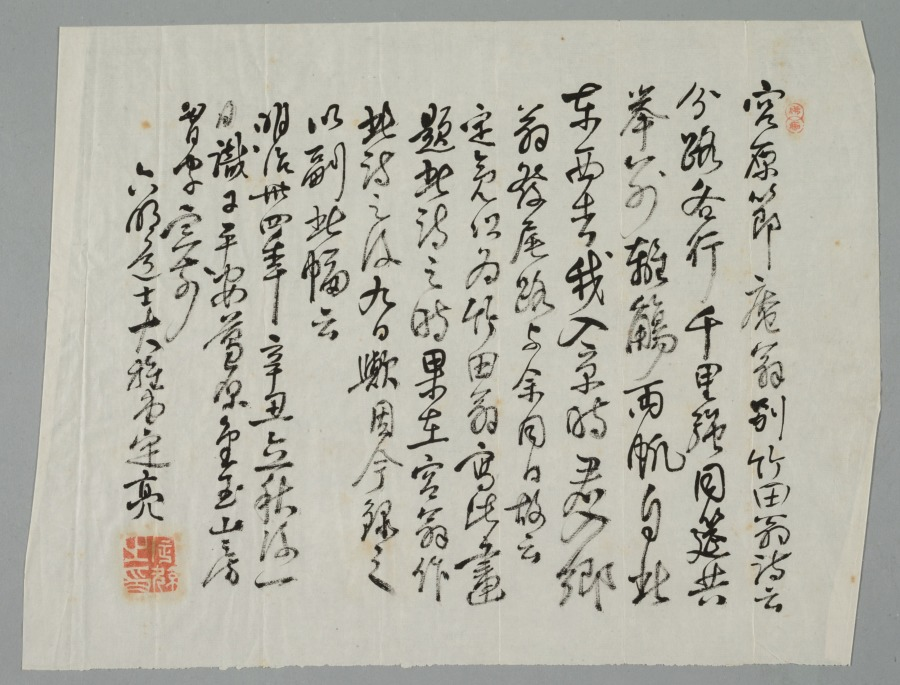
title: Mountain View and Blue Water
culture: Japan, Edo period (1615–1868)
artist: Tanomura Chikuden (Japanese, 1777–1835)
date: early 1800s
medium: hanging scroll; ink, color, and gold on paper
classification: Painting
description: Tanomura Chikuden was an eminent painter whose adopted son, Tanomura Chokunyū (1814–1907), was Seifū Yohei III’s painting teacher. This work was displayed at a gathering commemorating the 10th anniversary of Chokunyū’s death, something we know only because its custom-made box and archival documents have been carefully kept together. The box inscription also confirms that Chikuden was emulating the style of the Mi family of painters, active during China’s Southern Song dynasty (1127–1279). The painting’s Chinese-style silk wrapper is inscribed and sealed on its interior by members of Chokunyū’s community.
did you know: The mountain shapes are built up with multiple small wet strokes.